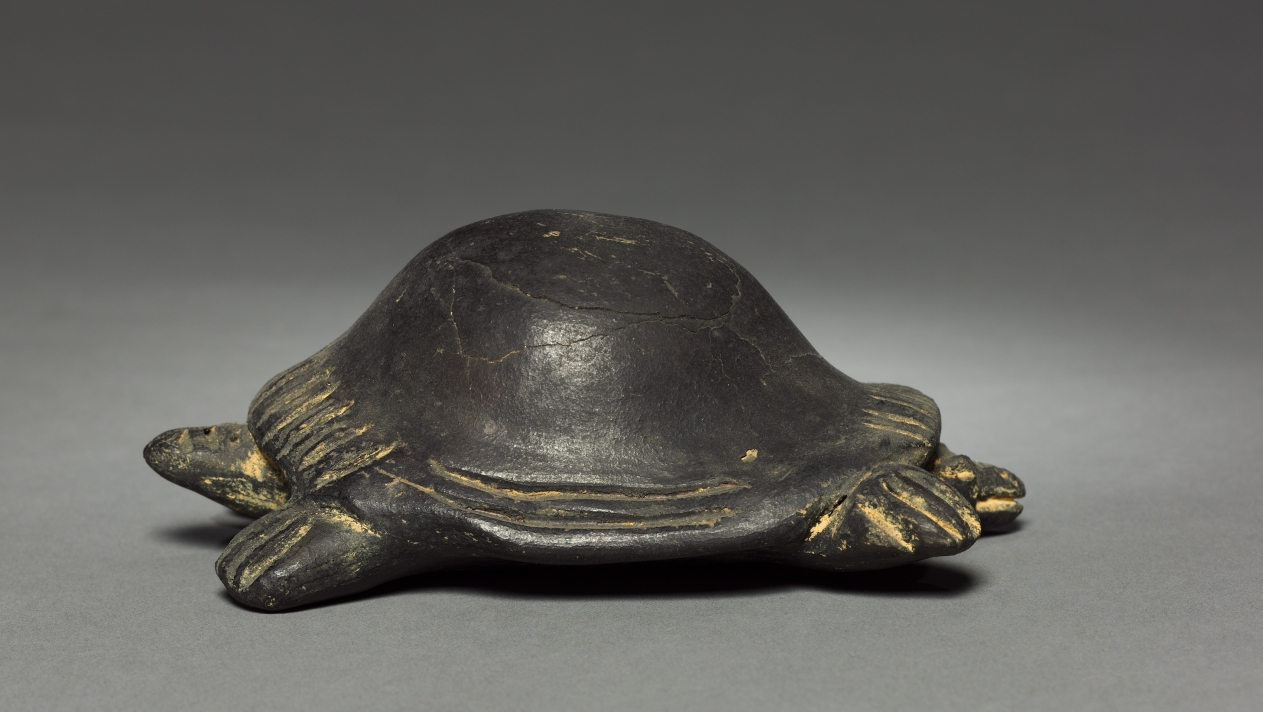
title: Turtle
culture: Colombia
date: before 1921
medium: pottery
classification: Ceramic